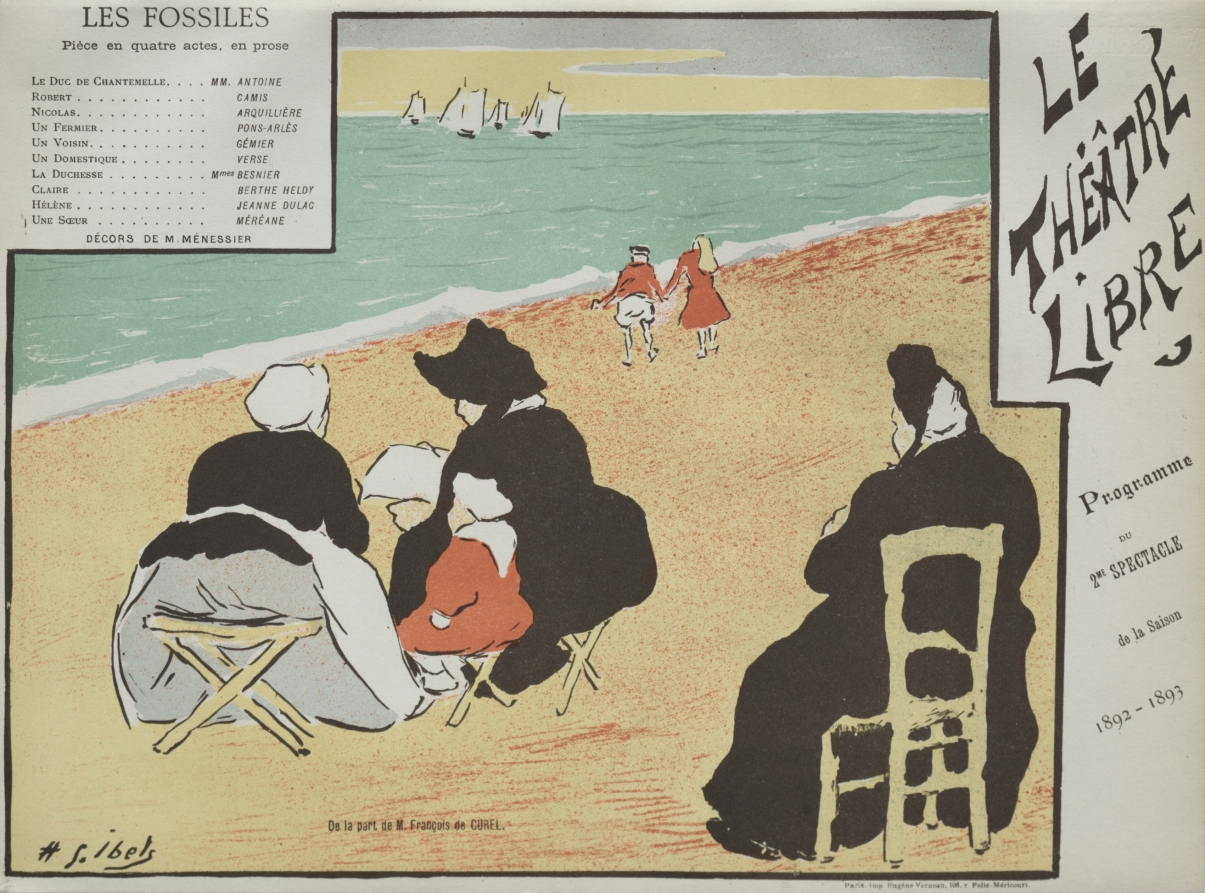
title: Les Fossiles (Program from Théâtre Libre)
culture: France, 19th century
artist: Henri Gabriel Ibels (French, 1867–1936)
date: 1892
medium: lithograph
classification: Print